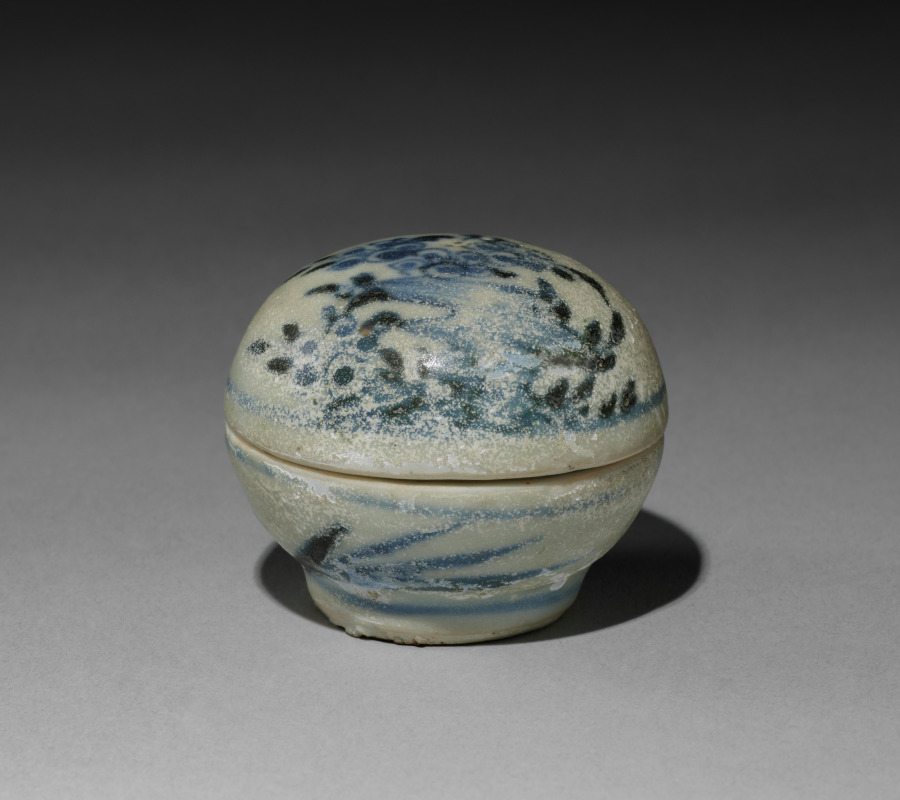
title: Pill Box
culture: China, Qing dynasty (1644-1911)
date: c. 1752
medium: porcelain with blue and white decoration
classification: Ceramic